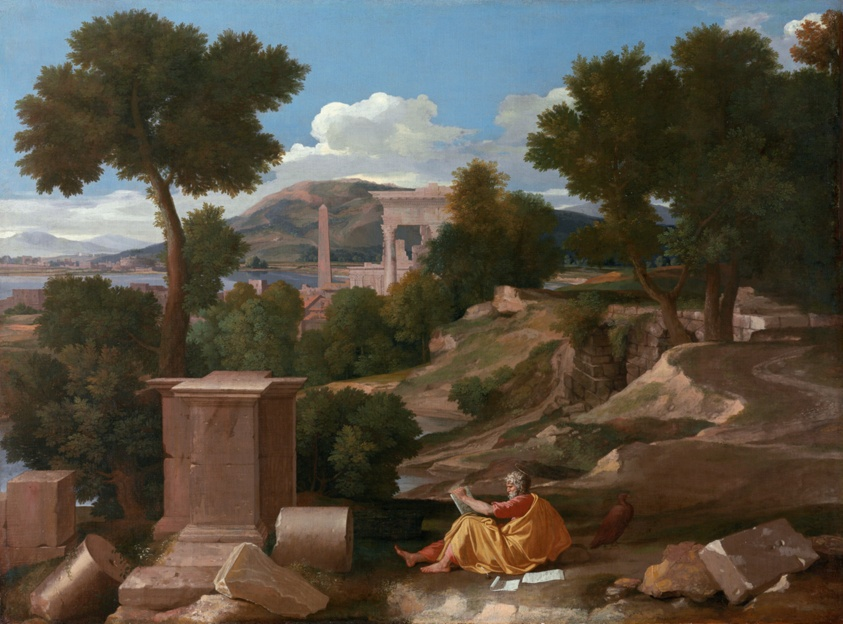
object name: Painting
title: Landscape with Saint John on Patmos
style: Renaissance, classicism, 17th Century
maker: Nicolas Poussin (French, 1594–1665)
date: 1640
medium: Oil on canvas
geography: France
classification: oil on canvas; paint; painting; european painting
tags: landscapes, saints, religion, Century of Progress, world's fairs, Chicago World's Fairs, trees, oblisks, ruins, Greece, Christian subjects